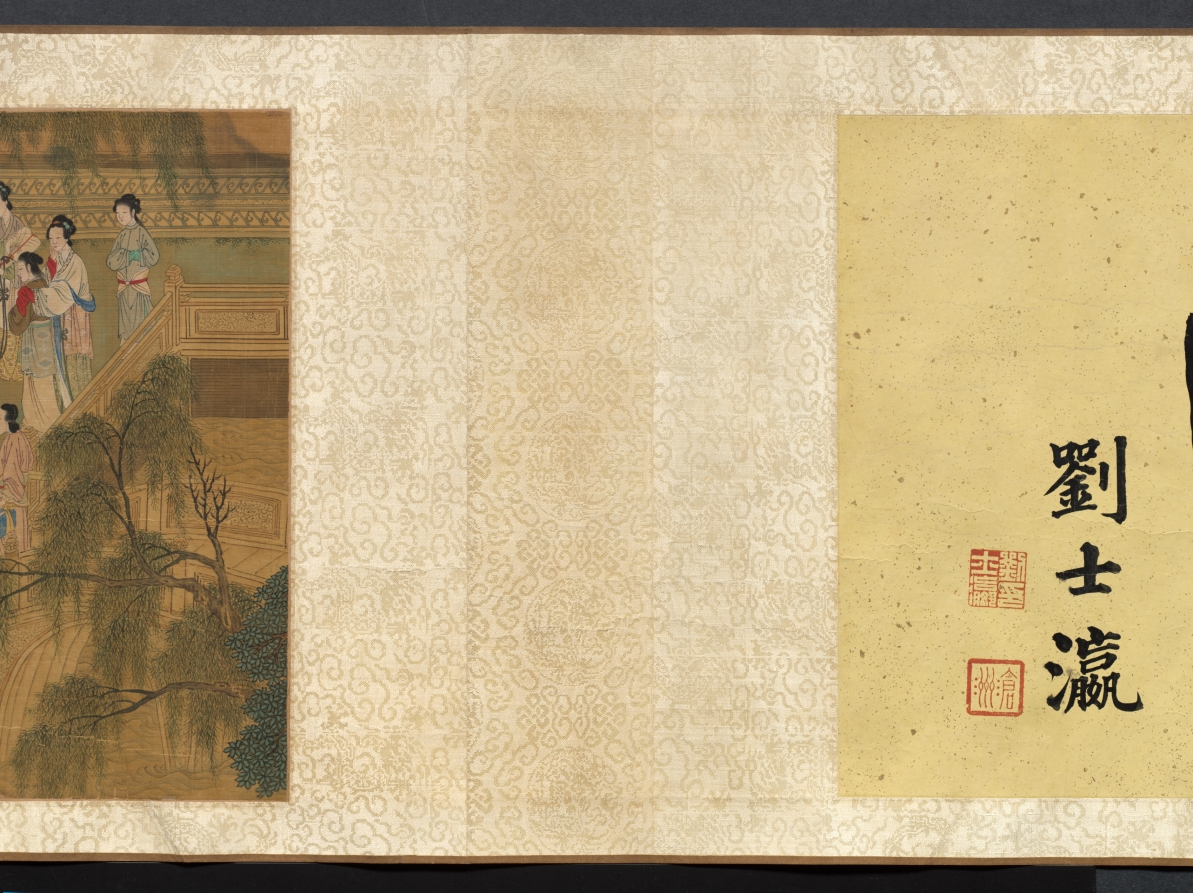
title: Palace Ladies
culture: China, Qing dynasty (1644-1911)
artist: copy after Qiu Ying (Chinese, 1494–1552)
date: 1644–1911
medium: handscroll, ink and color on silk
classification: Painting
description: This handscroll illustrates the pursuits of court ladies in a palace precinct on a spring day. Women, young girls, and their maids amuse themselves by sitting on a swing, playing games, watering and admiring peonies, performing music together, playing the qin (zither), feeding a parrot on the balustrade and fish in the water, or catching butterflies. The life of elite women was mostly restricted to the so-called inner quarters, meaning the garden and inner courts of the house. This painting idealizes the world of young palace girls that in fact was often filled with boredom and waiting for a lover.